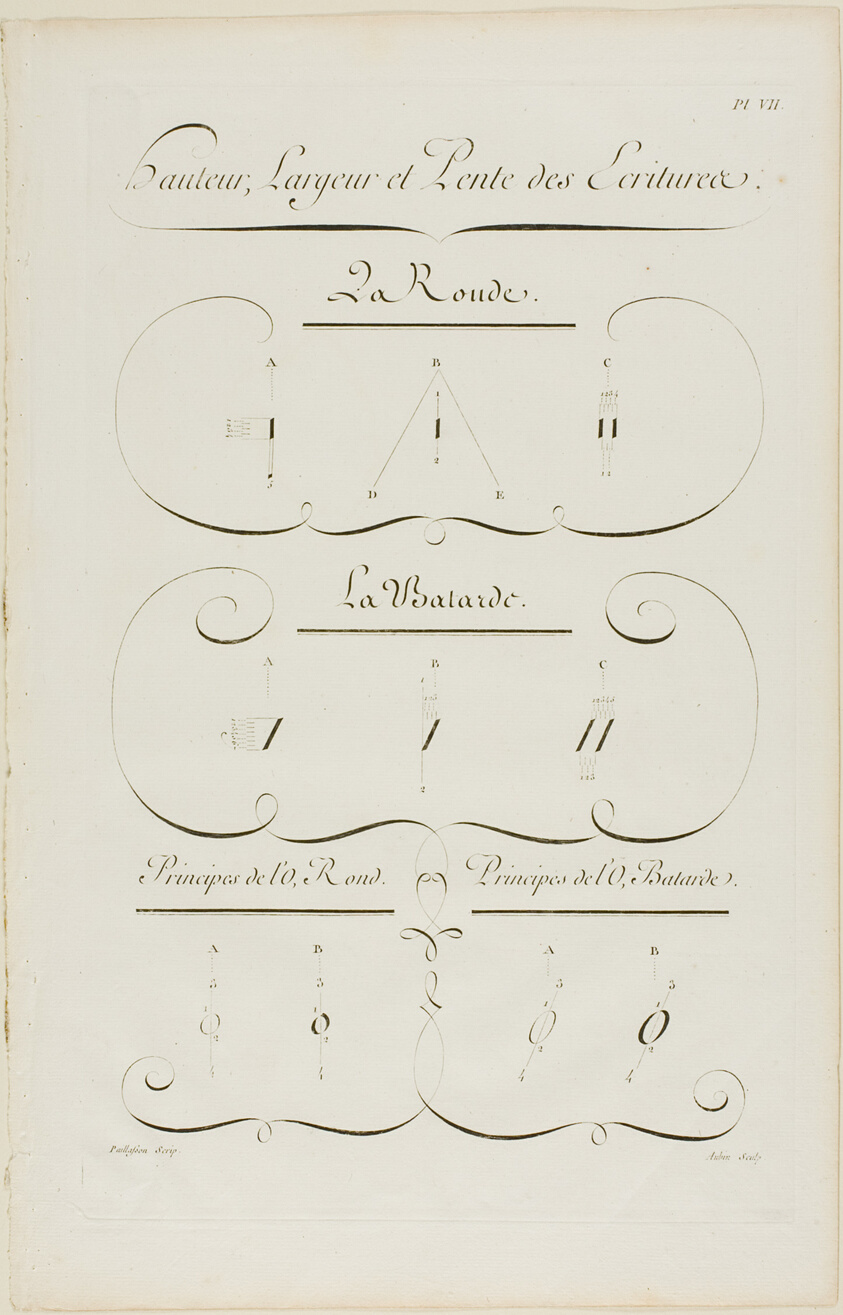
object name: Print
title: Height, Breadth and Slope of Writing, from Encyclopédie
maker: Aubin (French, active 18th century); after Charles Paillasson (French, 1718-1789); published by André le Breton (French, 1708-1779), Michel-Antoine David (French, c. 1707-1769), Laurent Durand (French, 1712-1763), and Antoine-Claude Briasson (French, 1700-1775)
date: 1760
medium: Engraving on cream laid paper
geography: France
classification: engraving; print; prints and drawing